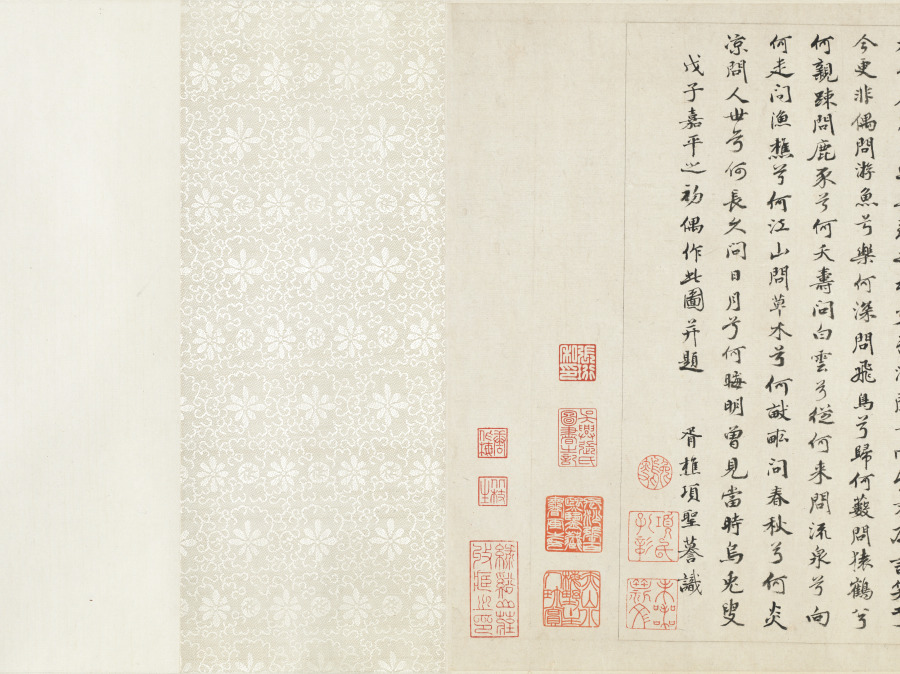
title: Meditative Visit to a Mountain Retreat: In Picture and in Words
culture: China, Ming dynasty (1368–1644)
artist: Xiang Shengmo (Chinese, 1597–1658)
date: 1648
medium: handscroll; ink on paper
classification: Painting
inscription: Artist's title and 3 seals (in front of painting): [title] Meditative Visit to a Mountain Retreat: In Picture and in Words 巖栖思訪圖詠 [3 seals] Tian lai ge zhong wen sun 天籟閣中文孫; Xiang shi kong zhang zui xin han mo 項氏孔彰醉心翰墨; Qing fu yuan zhong di yi miao ye 清福緣中第一妙業.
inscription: [印] 兔烏叟; 考古正今. 觀斯人兮何逍遙，非逍遙兮思其友。 思其友兮天一方，欲一訪之難回首。 松耶柏耶稱後凋，巖穴霏微何二酉。 山兮水兮人悠悠，遠莫致之神交否？ 河關一向望不及，言笑于今更非偶。 問游魚兮樂何深？問飛鳥兮歸何藪？ 問猿鶴兮何親疎？問鹿豕兮何夭壽？ 問白雲兮從何來？問流泉兮向何走？ 問漁樵兮何江山？問草木兮何畝畎？ 問春秋兮何炎涼？問世人兮何長久？ 問日月兮何晦明？曾見當時烏兔叟？ 戊子嘉平之初偶作此圖并題。 胥樵項聖謩識。 [印] 兔烏叟; 項氏孔彰; 未喪斯文.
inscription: 13 additional seals: 4 of Tang Zuomei 唐作梅 (late 18th–19th century); 3 of Zhang Baixi 張百熙 (1847–1907); 4 of Zhang Heng 張珩 (1915–1963); 2 unidentified.